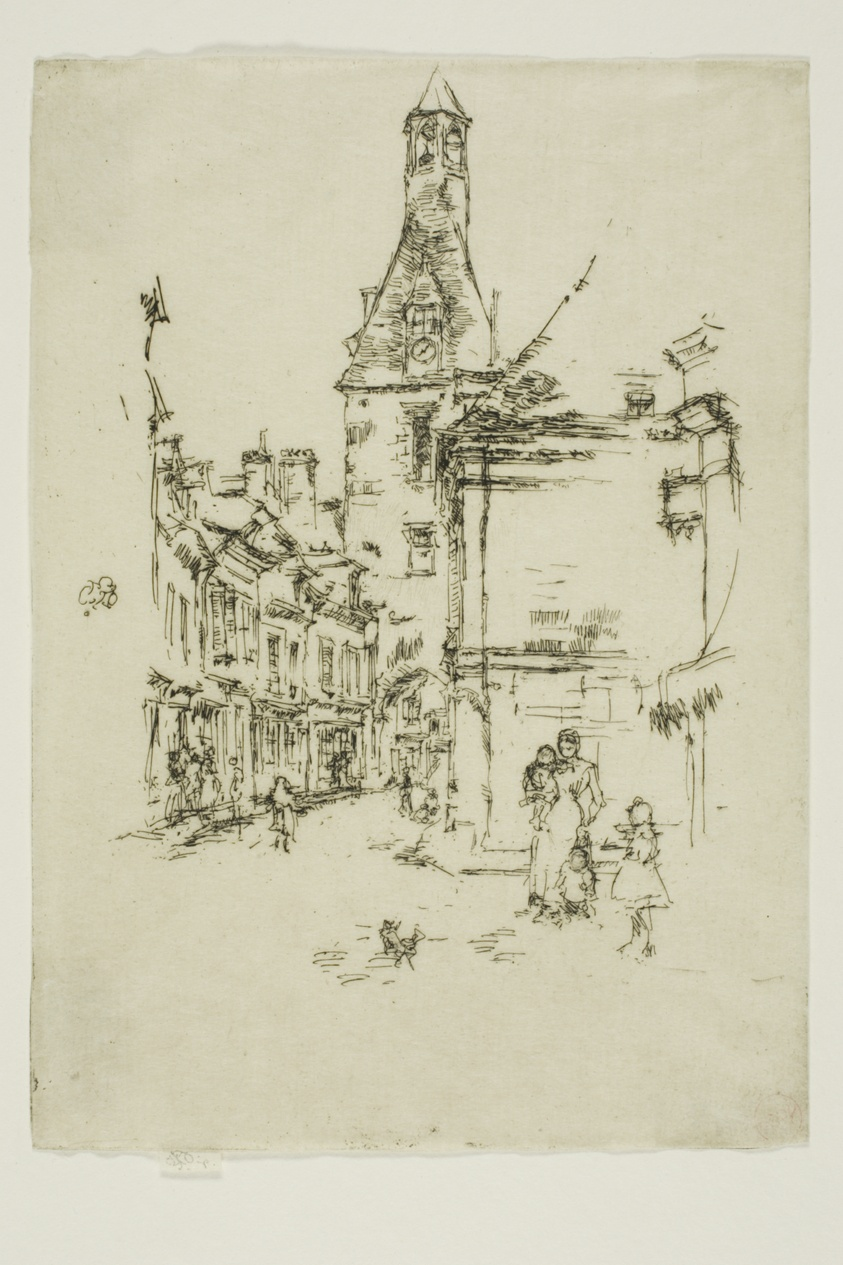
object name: Print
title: The Clock Tower - Amboise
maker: James McNeill Whistler (American, 1834-1903)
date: 1888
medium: Etching and drypoint with foul biting on cream Japanese paper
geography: United States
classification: etching; drypoint; print; prints and drawing; foul biting; paper